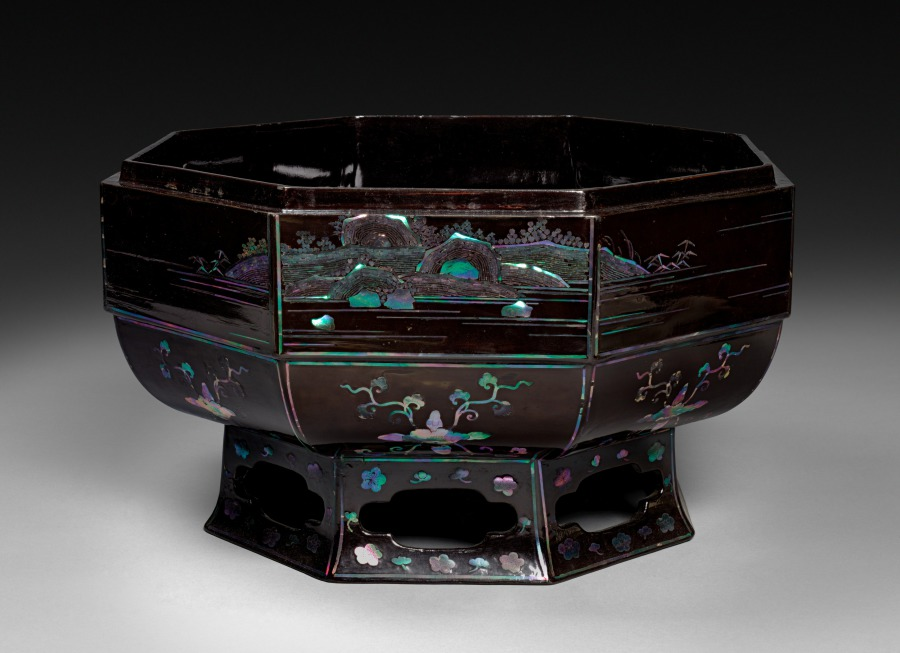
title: Octagonal Food Box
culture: Japan, Edo period (1615–1868)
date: late 1700s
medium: wood with black lacquer and mother-of-pearl (Ryukyuan)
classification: Lacquer